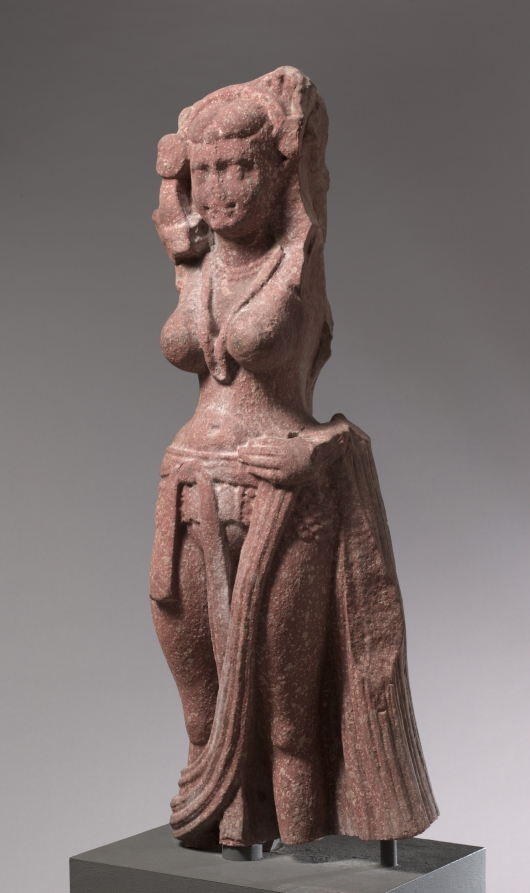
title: Nature Divinity (Yakshi)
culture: India, Mathura, Kshatrapa period (c. 20 BCE–114 CE)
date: c. 75 CE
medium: mottled red sandstone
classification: Sculpture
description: This powerful figure personifies the ideal of the young mother in the form of a nature goddess associated with birth and nourishment. Her iconic stance with the weight equally distributed on both feet indicates that this statue was an object of worship. Her extraordinary headdress, well preserved in the back, and full complement of jewels and ornaments, point to the idea of wealth, which leads to prosperity.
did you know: The prominence of the peacock (enemy of serpents) on the back of her headdress suggests she has the power to protect against snakebite.